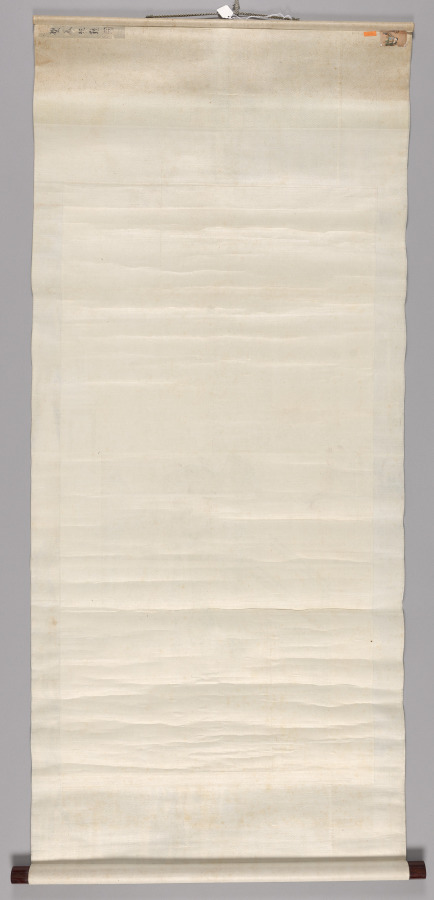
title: Two Beauties Inspect a Golden Lotus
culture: China, Qing dynasty (1644–1911), Qianlong period (1736–95)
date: 1736–95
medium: Hanging scroll; polychrome woodblock print; ink and color on paper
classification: Print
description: In the 1600s, printing flourished in such Jiangnan cities as Nanjing, Suzhou, Hangzhou, and Huizhou, evolving from privately enjoyed illustrated books printed in color to more commercialized single-sheet color prints that were hung on walls and became part of the rich urban visual culture.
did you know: Woodblock printing in color reached a height in China in the 1600s to 1700s. The prints were executed by means of sets of separate blocks, each carved to print a different color.